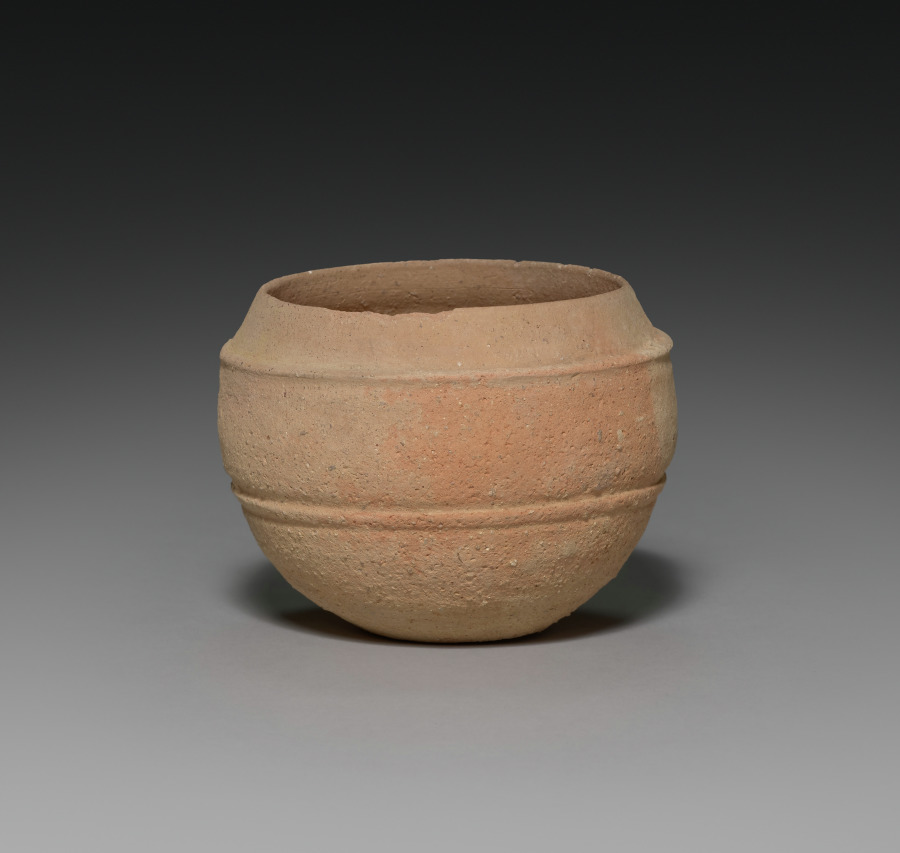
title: Lidded Jar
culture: Korea, Silla (57 BC-935) or Kaya (AD 42-562) period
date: 400s–500s CE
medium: red earthenware with incised band designs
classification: Ceramic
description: Early earthenware from the Three Kingdoms period (57 BCE–668) became widely utilized as agriculture and religion grew to be essential elements in sustaining society and its systems. The clay jars of different sizes and shapes on display were made for the following purposes: some were used to store harvested grains and seeds, some, especially lidded ones such as this, to preserve cremated remains, and some to serve offerings in rituals.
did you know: Closed kilns built on hillsides became widely used for producing this type of pottery vessel in Korea during the Three Kingdoms period.